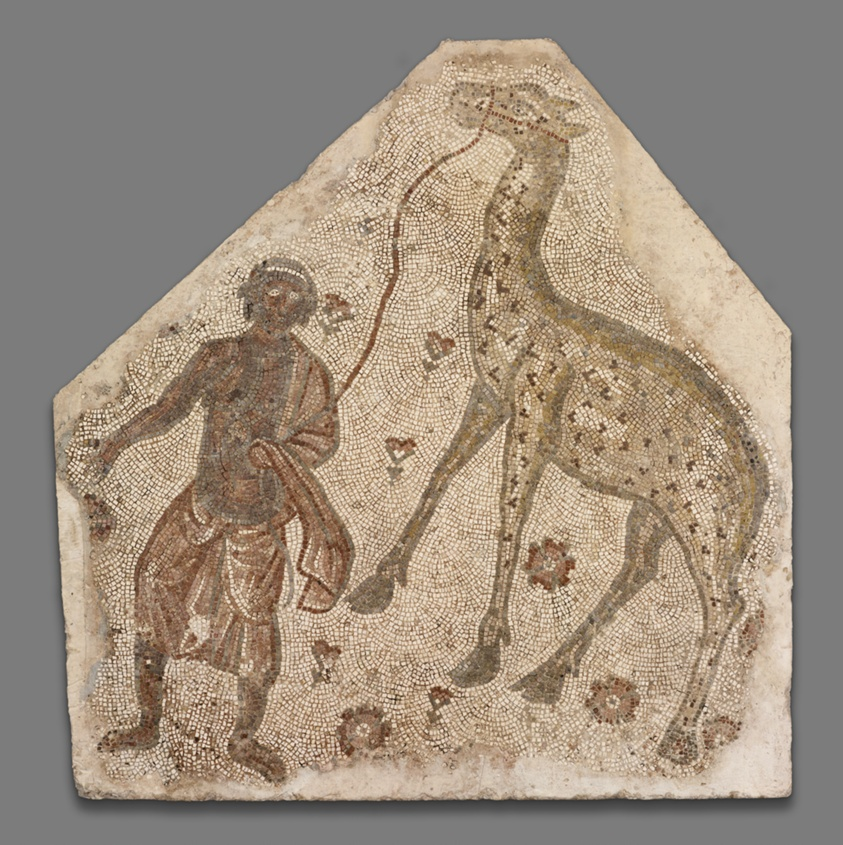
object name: Architectural fragment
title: Mosaic Fragment with Man Leading a Giraffe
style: byzantine, ancient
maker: Byzantine; Syria or Lebanon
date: 5th century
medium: Stone in mortar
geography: Tyre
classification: architectural fragment; mosaic; ancient art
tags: animals, men